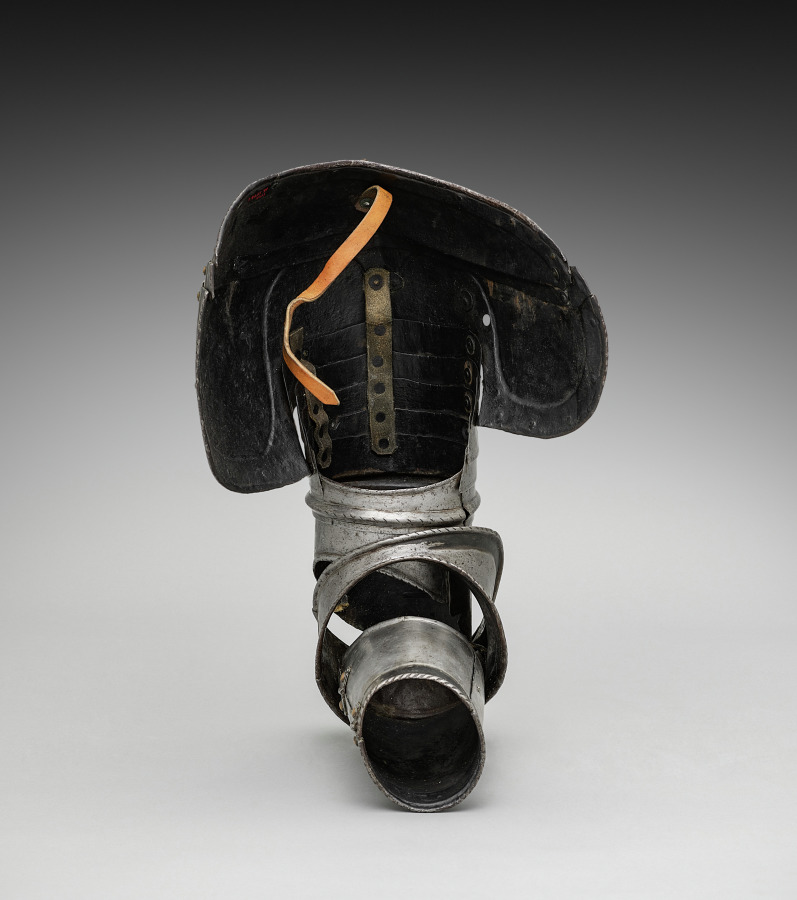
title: Left Pauldron with Rerebrace (upper cannon) and Lower Cannon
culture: Germany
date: c.1550–1570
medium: iron, steel, leather and brass rivets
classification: Arms and Armor